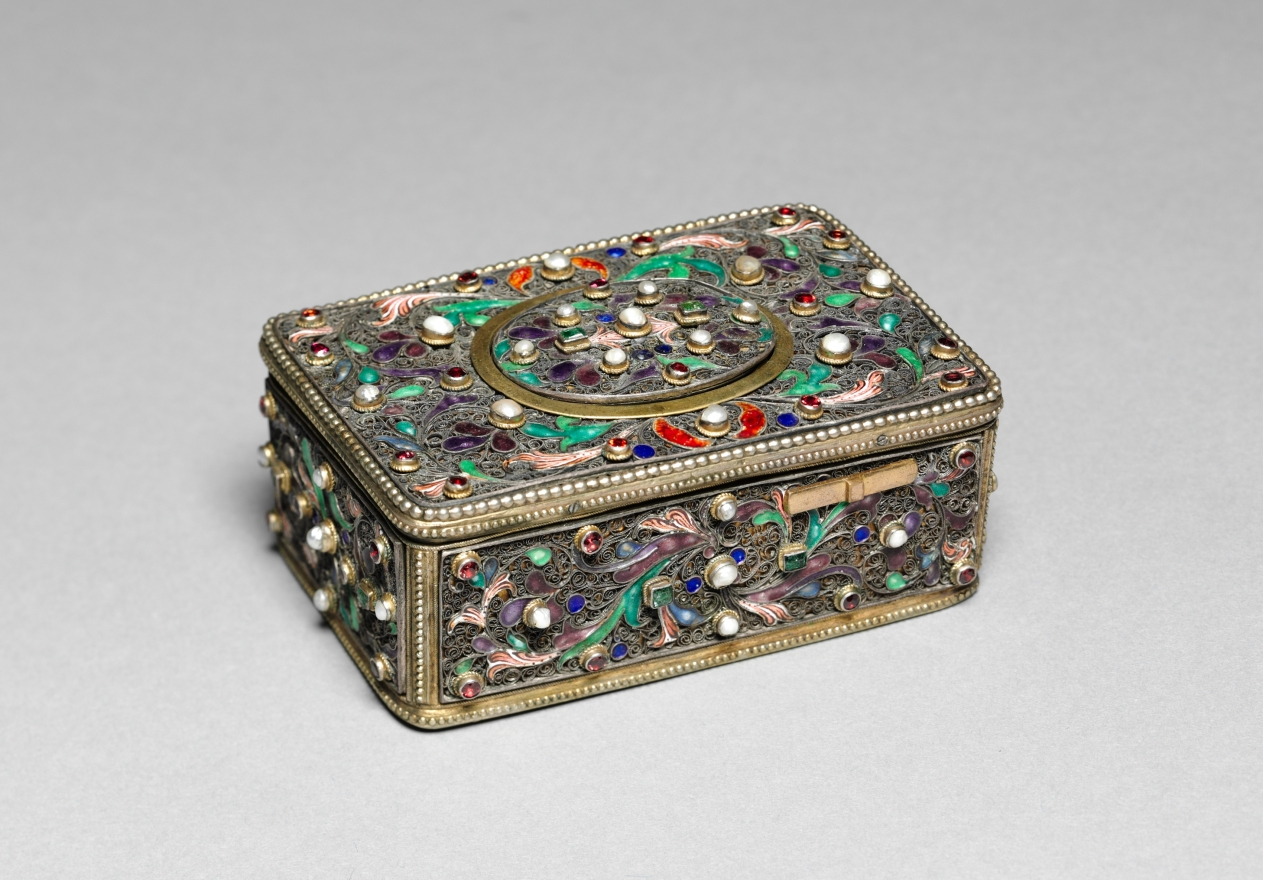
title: Music Box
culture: Switzerland or Germany, 19th century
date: 1800s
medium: gilt metal, enamel, semi-precious stones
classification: Miscellaneous